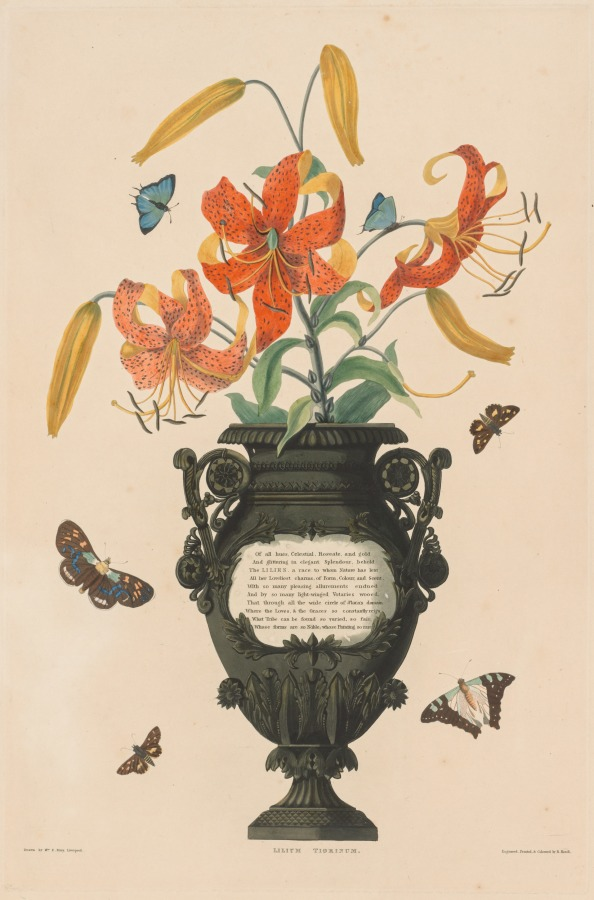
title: A Selection of Hexandrian Plants, belonging to the natural order of Amaryllidae and Liliacae: Tiger Lily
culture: England, 19th century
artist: Robert Havell (British, 1769–1832)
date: 1831–32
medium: aquatint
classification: Print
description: The late 18th century saw the development of color printing, a laborious process in which the image is built up from separate plates for each color. Applying Newton’s theory of color, a plate was prepared for each of the three primary colors (blue, yellow, and red) as well as for a darker color (usually black, to provide a unifying background tone). These plates, too, were often embellished with hand work in watercolor